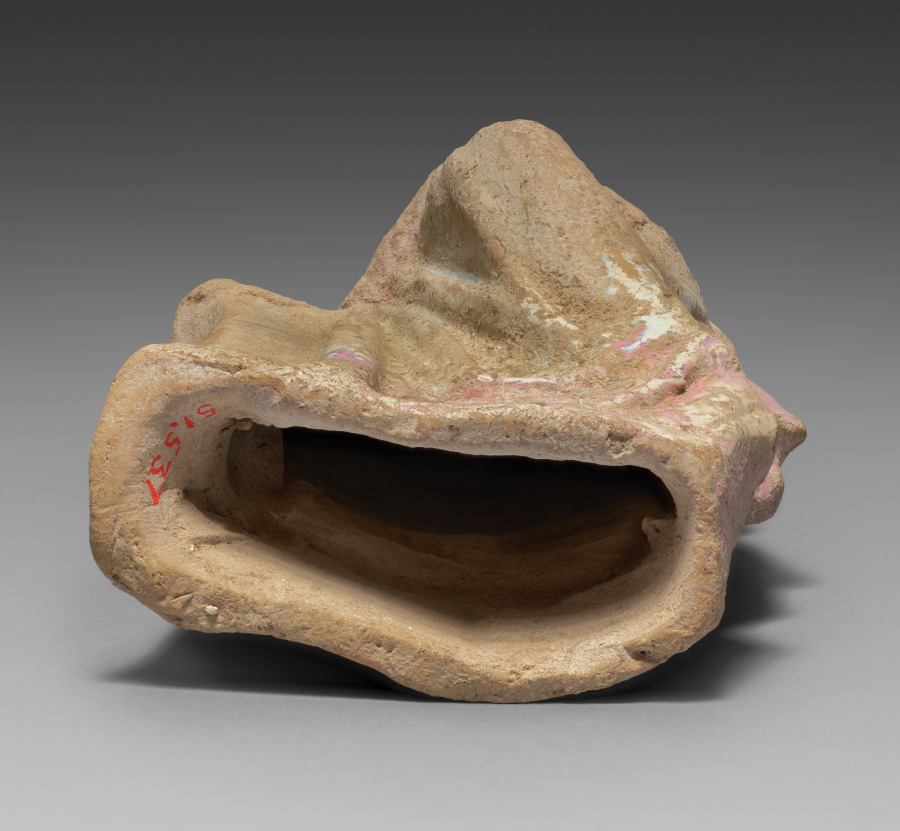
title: Figurine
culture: Greece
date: 300–100 BCE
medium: terracotta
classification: Sculpture